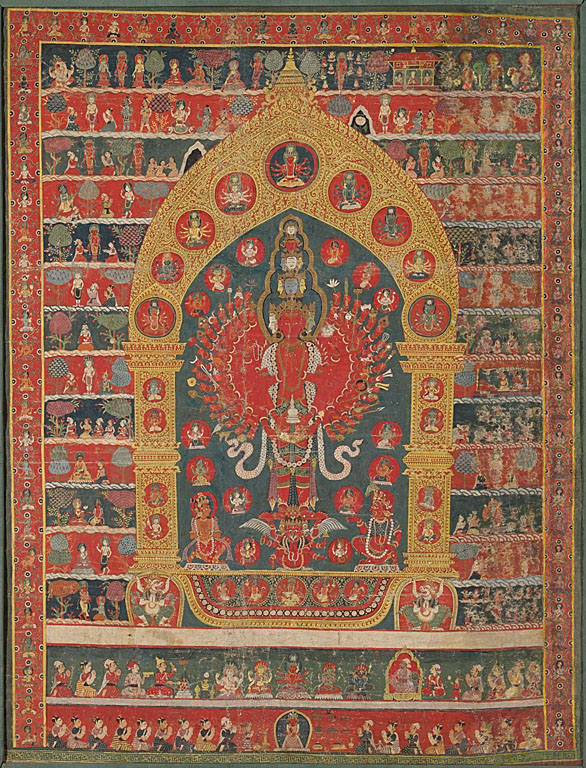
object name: Painting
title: Painted Banner (Thangka) of the Avalokiteshvara Incarnation of the Rain God Rato Matsyendranatha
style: Himalayan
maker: Nepal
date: 18th/19th century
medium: Opaque watercolor on textile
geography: Nepal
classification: painting; asian art